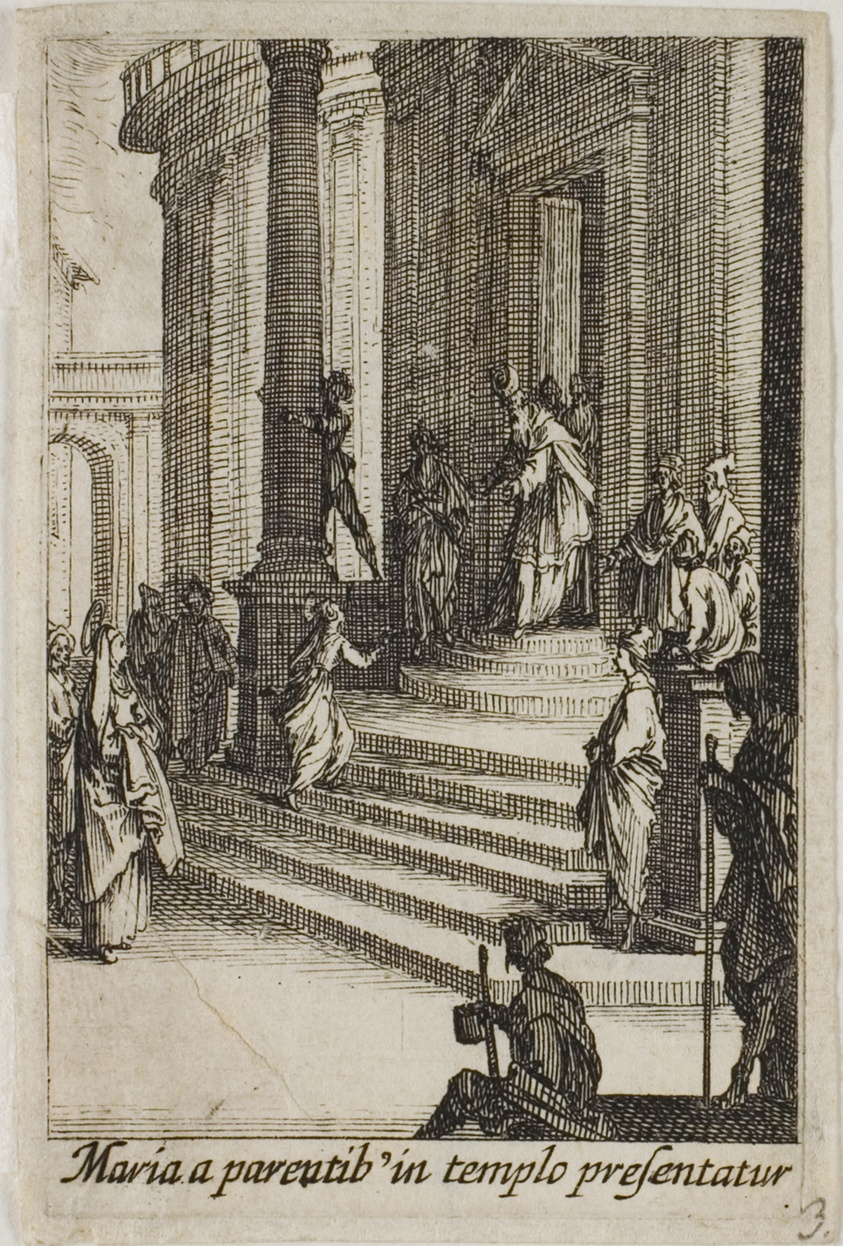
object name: Print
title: The Virgin Mary Presented at the Temple, from The Life of the Virgin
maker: Jacques Callot (French, 1592-1635)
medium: Etching on paper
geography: France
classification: etching; print; prints and drawing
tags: Virgin Mary, Christian subjects, mythology, prints and drawings